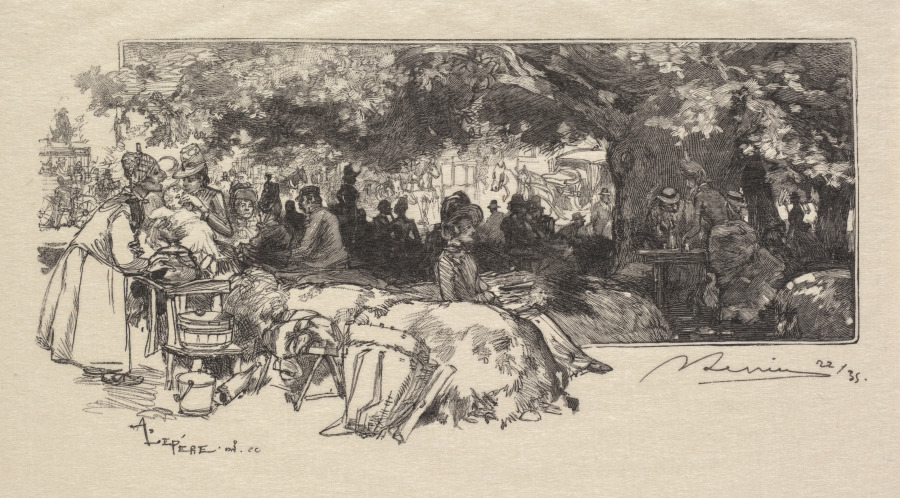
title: Fontainebleau Forest: Mother Pichard's Canteen (La Forêt de Fontainebleau: Cantine de la mère Pichard)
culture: France, 19th century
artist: Auguste Louis Lepère (French, 1849–1918)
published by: A. Desmoulins, Published in Revue Illustrée, 1887–90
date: 1890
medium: wood engraving from bound volume of 34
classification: Bound Volume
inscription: In block, lower left: A. LEPÈRE. Del. sc; below image, lower right, in black ink: ALepère 22/35; on window mat, lower right, in graphite: Cantine de la mère Pichard